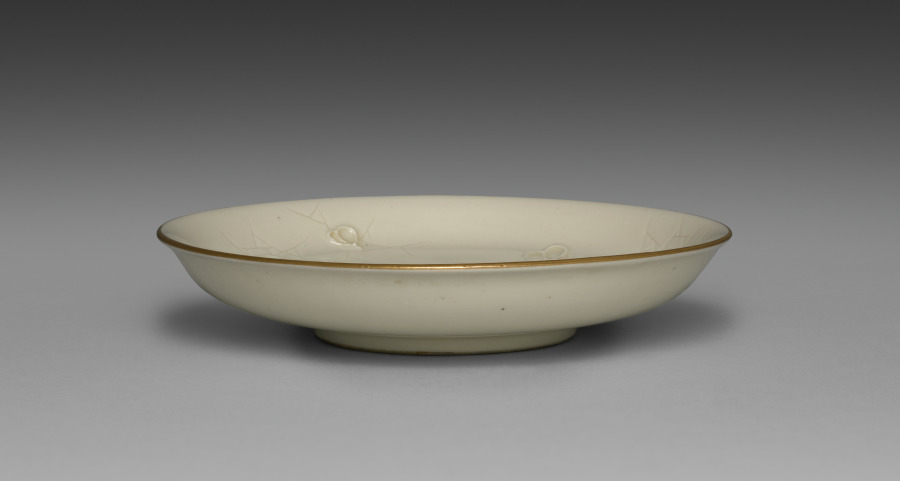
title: Medium-sized Dish from Dining Set with Plum Blossoms and Cracked-Ice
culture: Japan, Meiji period (1868–1912)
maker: Seifū Yohei II (Japanese, 1844–1878)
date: c. 1875–78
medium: Porcelain with molded designs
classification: Ceramic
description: Each item in this set has a delicate low-relief design of flowering plum branches over scattered, intersecting lines meant to resemble the cracked-ice surface of a frozen body of water and is signed on the base in gold pigment. While Yohei II produced many fine works in underglaze blue, like those produced by Kiyomizu Shichibei, he also made works in quite different styles later in his career, from the early 1870 s. In 1873, he was appointed purveyor to the Industrial Center of Kyoto Prefecture, a designation associated with Kyoto’s efforts to reach an international market through the port of Kobe; and from 1875 until his death, he was involved in national-level projects to present Japanese ceramics across the world. It was during this period that Yohei III was apprenticed to Yohei II, and it has been suggested that this set may in fact be an early example of Yohei III’s work, which he signed with his teacher’s name. Decorated with flowers resembling Japanese textile motifs, the set calls to mind the design of Yohei II’s pair of vases with plum blossoms in the Victoria and Albert Museum. Here, the elaborate trees created for a formal public exhibition setting have been translated into the approachable blossoms of the genteel domestic environment. While the designs are consistent across the pieces, each raised flower petal and pistil and each incised line in the ice was done by hand, so the cups, bowls, and dishes are similar yet unique. The bottoms of two boxes once identified the set’s owner, but the information has been deliberately obscured with black ink. However, inscriptions still visible appear to indicate two occasions, once at the end of July 1886 , and once again in June 1916 , when parts of the set were requested from Hokura in Niigata Prefecture. The location corresponds to a neighborhood in the present-day city of Jōetsu. The surname Tsuji 辻 also appears on a paper tag affixed to one of the box cloths. Future research may possibly reveal more about their provenance. A vase by Yohei III in a private collection combines the formal grandeur of the Yohei II vases in the Victoria and Albert Museum with the gentler design of this dining set, placing flowering plum trees against soft, scalloped-edge clouds resembling those in golden screens.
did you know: The dining wares have a creamy white coloration that the four boxes containing them identify as Korean in style.